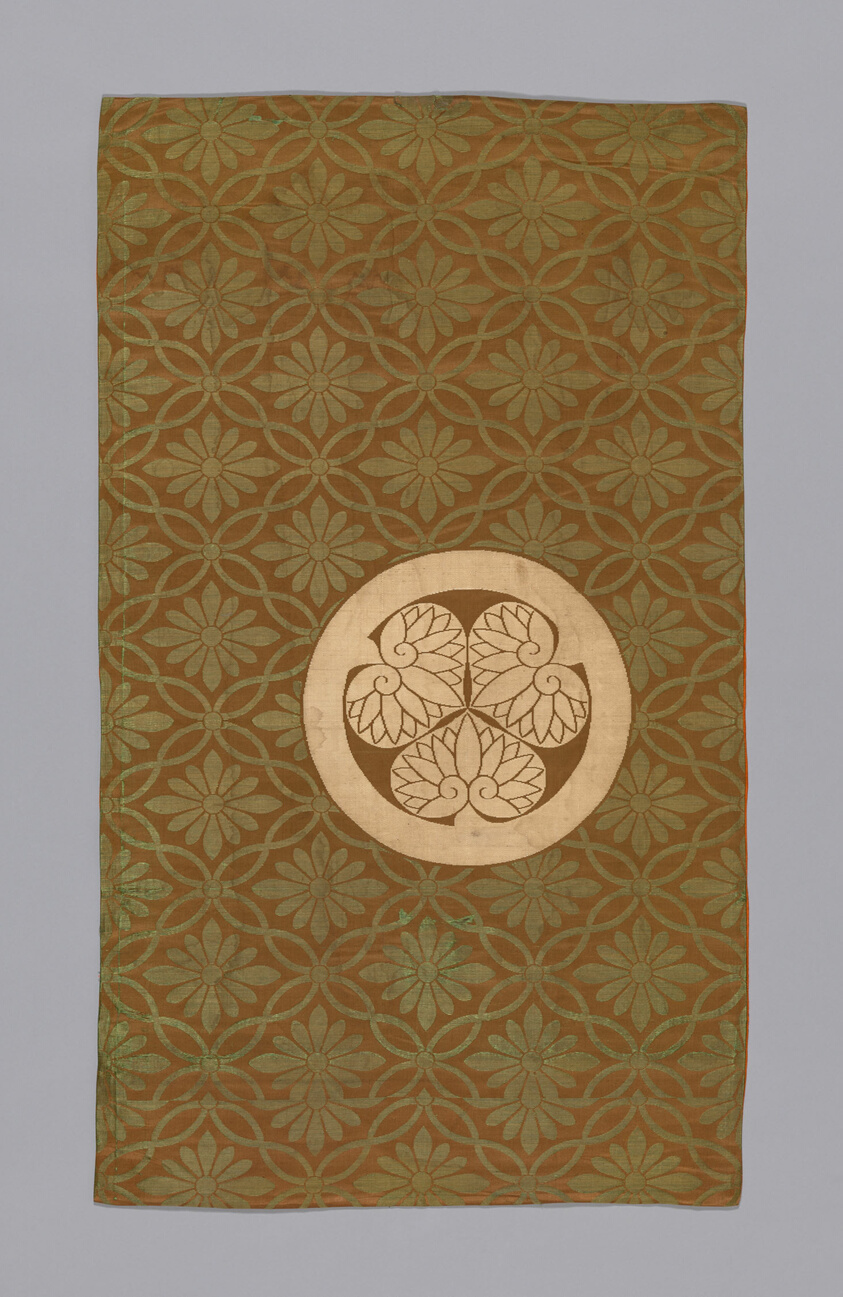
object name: Textile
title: Fragment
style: late edo, Japanism, meiji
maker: Japan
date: late Edo period (1789–1868)/ Meiji period (1868–1912), 19th century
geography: Japan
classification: textile; weaving